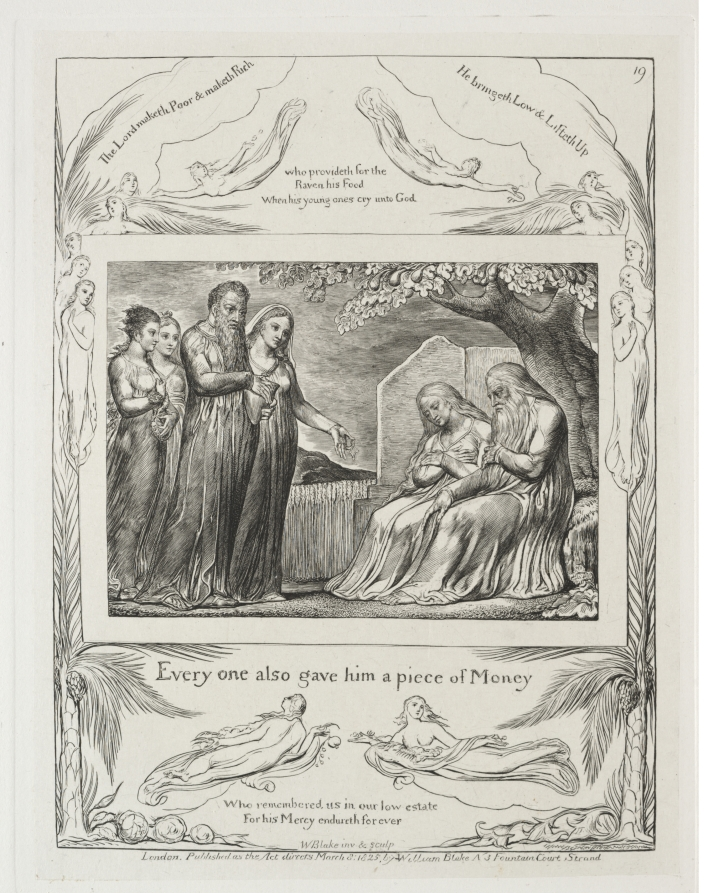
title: The Book of Job: Pl. 19, Every one also gave him a piece of money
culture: England, 19th century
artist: William Blake (British, 1757–1827)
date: 1825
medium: engraving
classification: Print